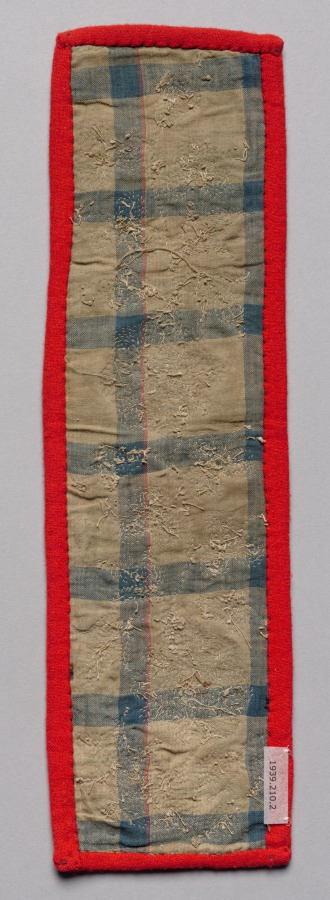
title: Beaded Panel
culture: Northeast Woodlands, Great Lakes Region, Anishinaabe (Ojibwe) or Nehiyawak (Cree) People?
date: late 1800s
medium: glass beads on wool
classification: Textile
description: In the 1800s, native peoples began to use European fabrics to fashion fine formal garments; they favored sturdy cloth, such as velvet and wool broadcloth, which provided support for heavy decorative beadwork that was added by hand. Often the fabric was a dark color, providing dramatic contrast for the multicolored beads. Rather than encrusting the entire garment, beadwork was confined to cuffs, “epaulettes,” bib-like plackets and yokes, rectangular panels sewn to leggings, shirts, and dresses, and the like.